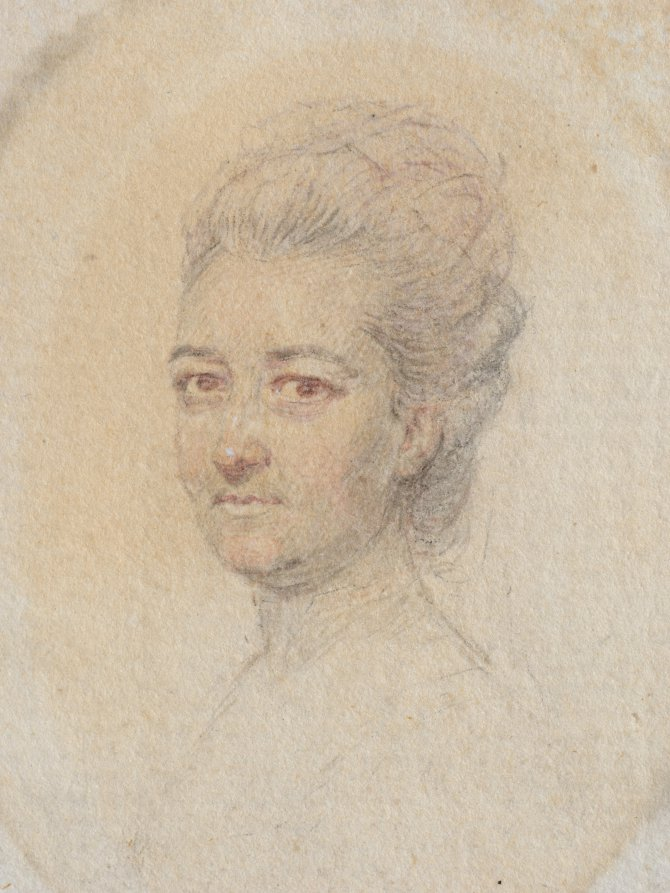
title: Portrait of a Woman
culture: England, 18th century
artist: John I Smart (British, 1741–1811)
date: c. 1775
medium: graphite and wash on laid paper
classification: Portrait Miniature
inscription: inscribed on paper backing in graphite, upside down, at upper right: 139; also on paper backing in graphite on slant at lower right corner: La belle/Gabrielle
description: Although it is impossible to say if it was always part of the artist’s process to execute a preparatory sketch prior to painting each miniature, we do know that John Smart retained many hundreds of these sketches. A group of preparatory sketches—of which this portrait is one—descended through the Smirke family after Smart’s daughter Sarah gave a sketchbook containing preparatory portrait studies to her friend Mary Smirke, sister of the celebrated Victorian architect Sydney Smirke. This book was probably broken up around 1877 when it was divided between Sydney’s daughters Mary Jemmett and Mrs. Lange, whose portions were both sold at auction in 1928. This portrait was assigned the historically colorful but fictitious title of “La Belle Gabrielle” at some point after memory of its true identity had been lost. Giving illustrious titles to portraits of unknown sitters was a popular strategy adopted by dealers during the nineteenth and twentieth centuries, often applied to miniature portraits and, in particular, to Smart’s sketches of women. The inscription on the paper backing is not in Smart’s hand, and when the paper backing was removed in 1993, no inscriptions were discovered on the back of the drawing itself. Only the sitter’s head and neck are drawn, and a low-necked dress is faintly suggested. Her head is turned to the right, and her light-colored hair is dressed high, with flat curls against the back of her head. She has brown eyes, and the color of her lips is extremely faded, though the hint of a ruddy complexion remains. Her sagging jaw line and the lines beneath her eyes suggest that this sitter was painted as a mature woman. The background is unpainted. To this date, the finished ivory for which this preparatory sketch was presumably undertaken has not been discovered.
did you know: Sketches helped John Smart work out the particulars of a portrait before commencing the miniature on ivory; they were useful in the event that a duplicate might later be required.